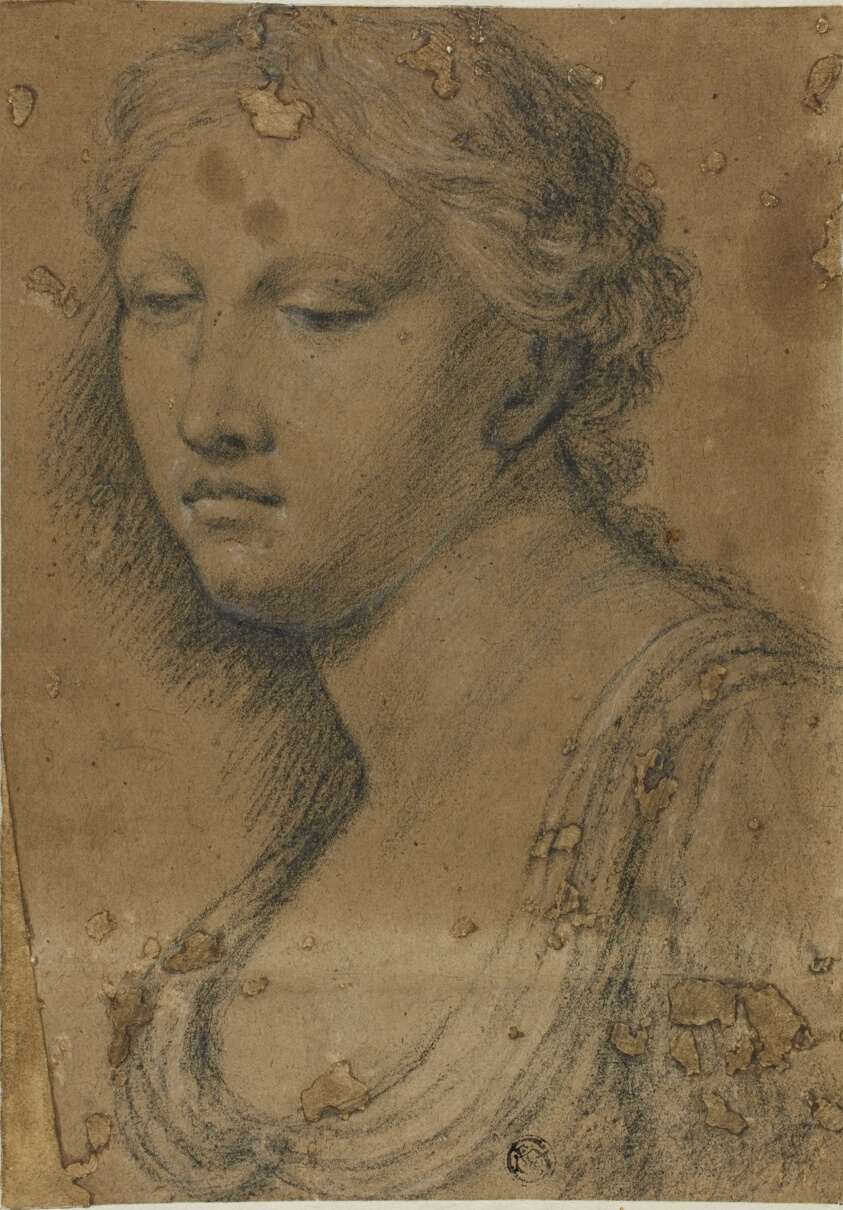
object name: Drawing and Watercolor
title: Bust of Woman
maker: Attributed to Girolamo Sellari, called Girolamo da Carpi; Italian, 1501-1556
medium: Black chalk, heightened with white chalk, on brown laid paper, laid down on ivory laid paper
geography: Italy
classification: chalk; charcoal; drawings (visual works); prints and drawing